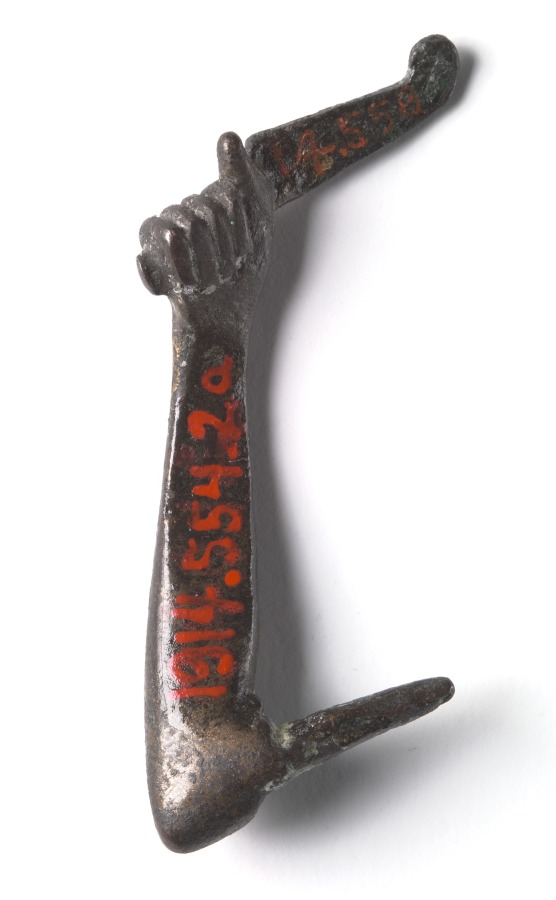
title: Bronze Mount from a "Shawabty Bundle": Arm with Feather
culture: Egypt, Thebes, Wadi Qubbanet el-Qirud, New Kingdom (1540–1069 BCE), Dynasties 18–19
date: c. 1336–1256 BCE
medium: bronze with traces of gilding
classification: Funerary Equipment